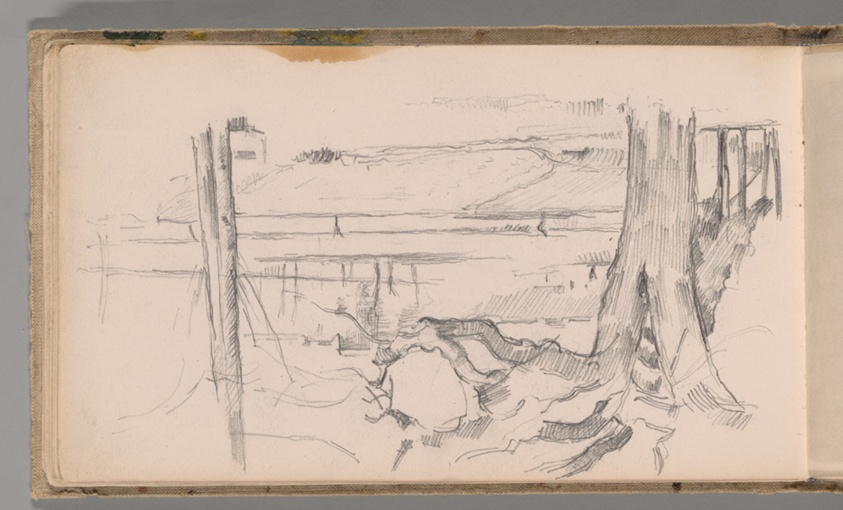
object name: Drawing and Watercolor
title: Sketchbook No. 2 (L'Estaque)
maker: Paul Cézanne; French, 1839-1906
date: 1875–86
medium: Graphite and pen and ink drawings on paper, bound into a book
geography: France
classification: sketchbook; graphite; prints and drawing; paper